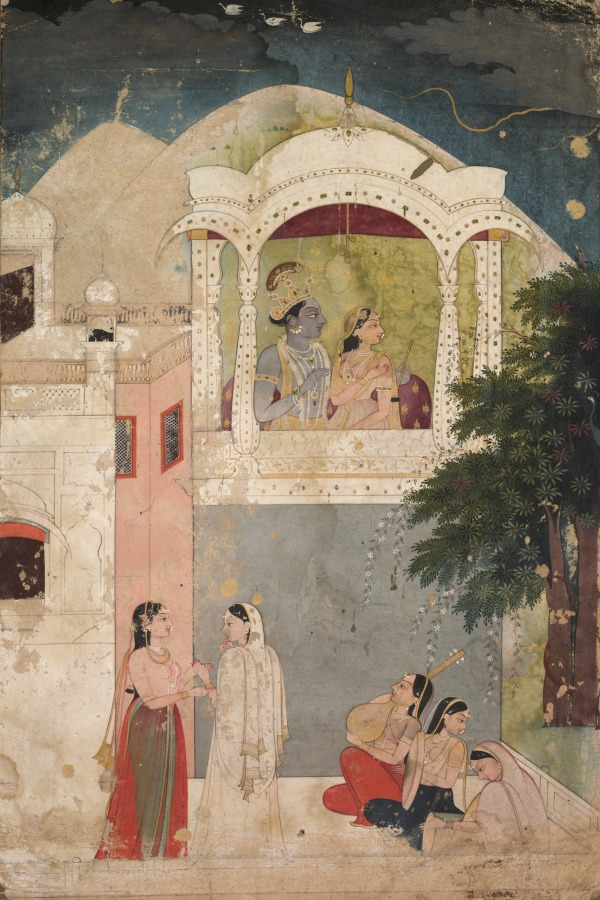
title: Radha and Krishna seated on a balcony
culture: Northern India, Pahari kingdoms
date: c. 1760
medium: Gum tempera, ink, and gold on paper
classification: Painting